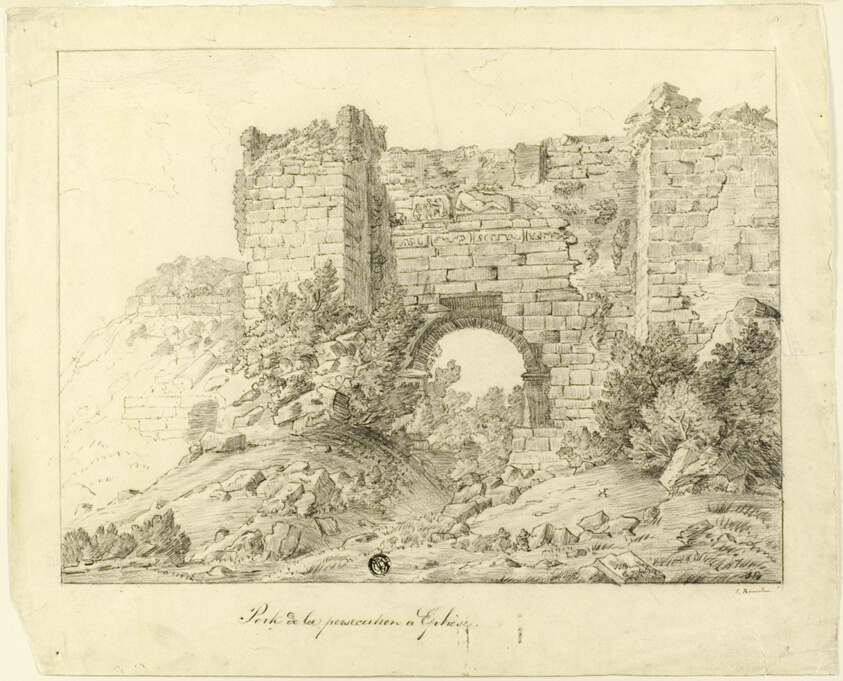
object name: Drawing and Watercolor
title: Persecution Portal, Ephesus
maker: Unknown Artist (United Kingdom, 19th century); or possibly John Raphael Brandon (English, 1817-1877)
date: c. 1820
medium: Black chalk on cream wove paper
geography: United Kingdom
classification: chalk; drawings (visual works); prints and drawing